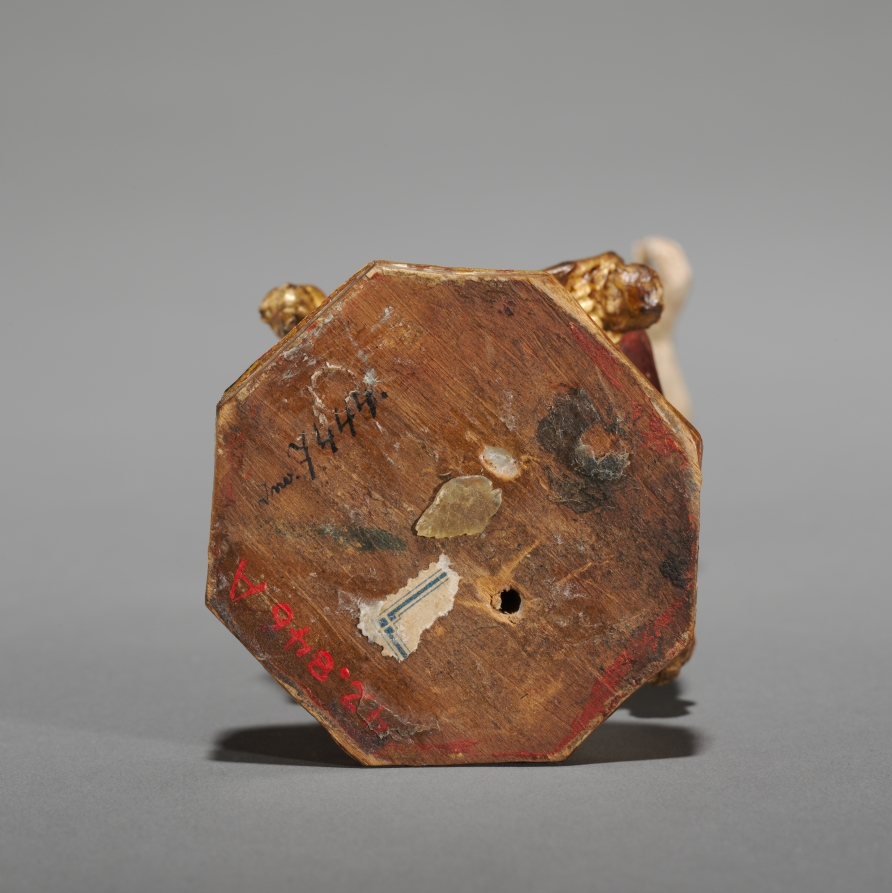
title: The Christ Child Holding a Pomegranate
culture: South Germany, 16th century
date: c. 1510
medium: painted wood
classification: Sculpture